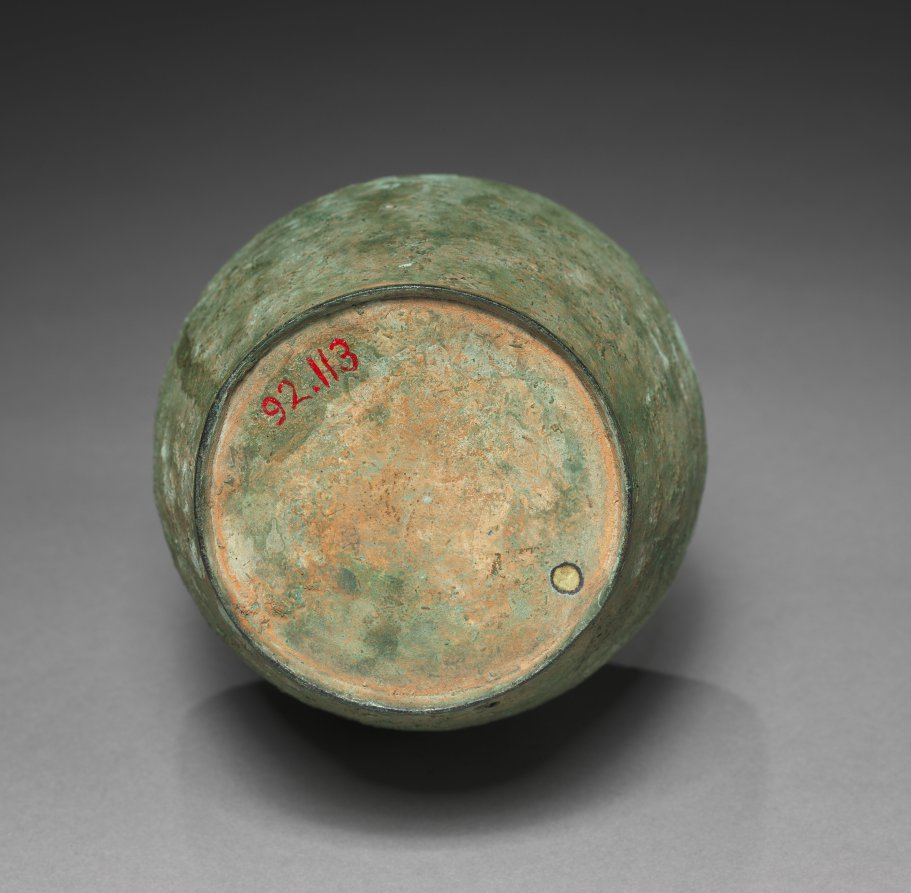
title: Gourd-Shaped Bottle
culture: Korea, Goryeo dynasty (918–1392)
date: 918–1392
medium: bronze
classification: Metalwork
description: As early as the seventh century, the practice of drinking tea and wine became an important part of elite culture in Korea. Elites of the Goryeo period commissioned a variety of types of ceramic and metal utensils including this bronze bottle, not only to make their drinking experience more exciting, but also to show their appreciation of nature.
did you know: This gourd-shaped bottle may have been used to serve wine.